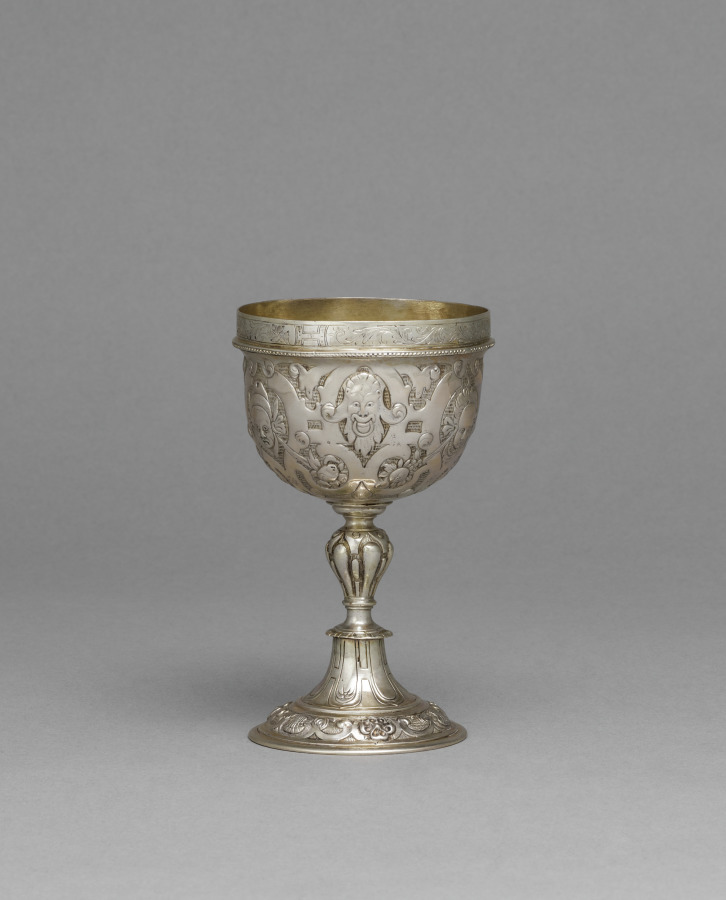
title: Bridal Cup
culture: Germany, Nuremburg(?), 17th century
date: c. 1600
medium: silver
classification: Silver